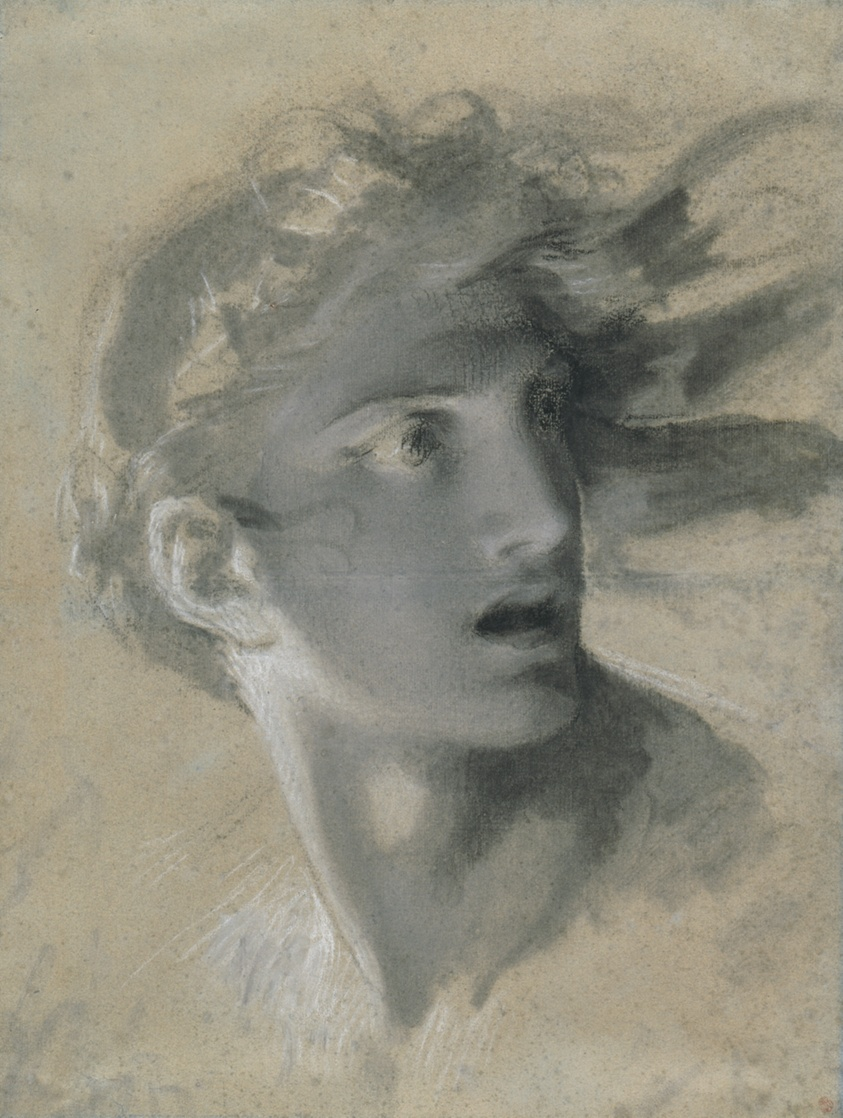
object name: Drawing and Watercolor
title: Head of Vengeance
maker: Pierre-Paul Prud'hon; French, 1758-1823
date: c. 1804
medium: Black and white chalk, with stumping, and with traces of blue chalk, on blue laid paper (faded to tan)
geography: France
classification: chalk; drawings (visual works); prints and drawing